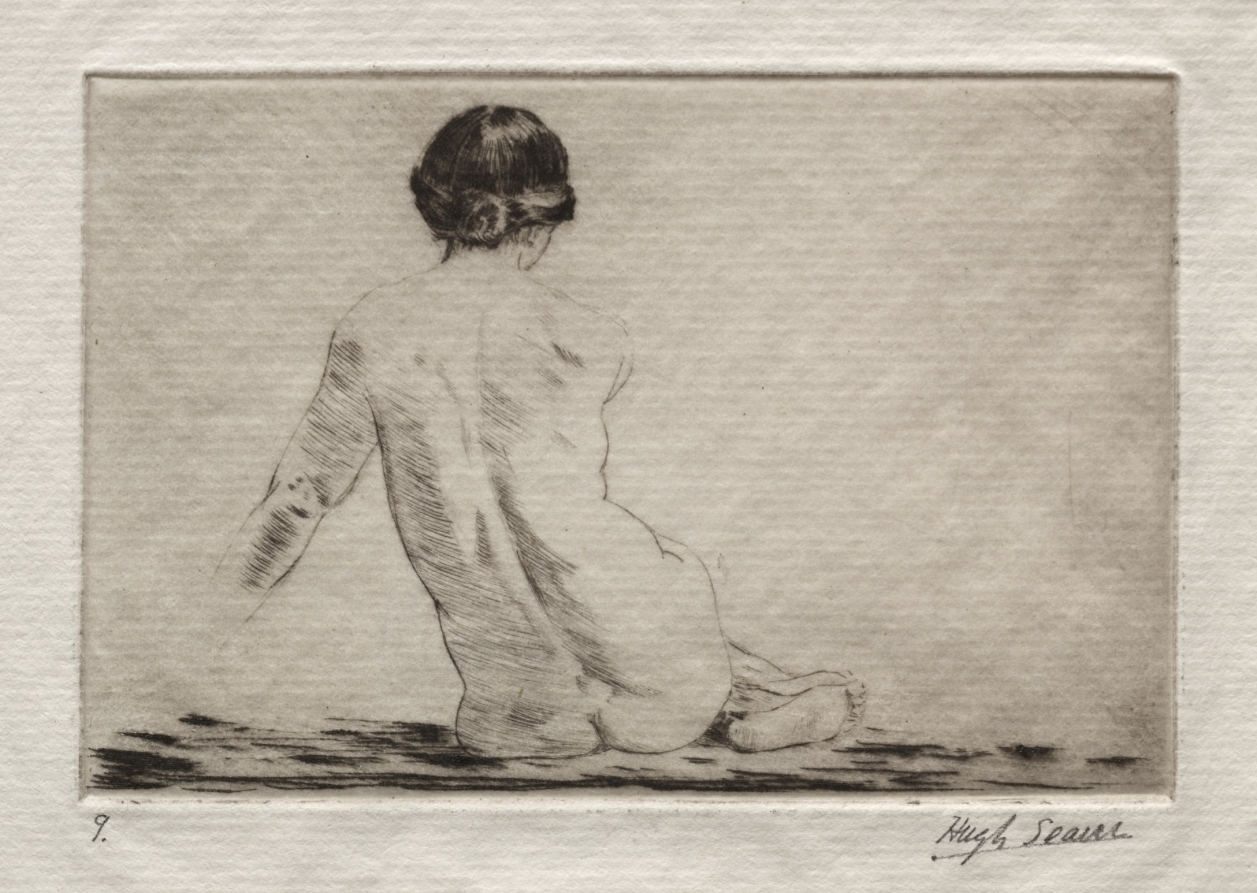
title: Back to the Studio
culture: America, Ohio, Cleveland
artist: Hugh Seaver (American, 1896–1959)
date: before 1927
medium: etching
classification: Print